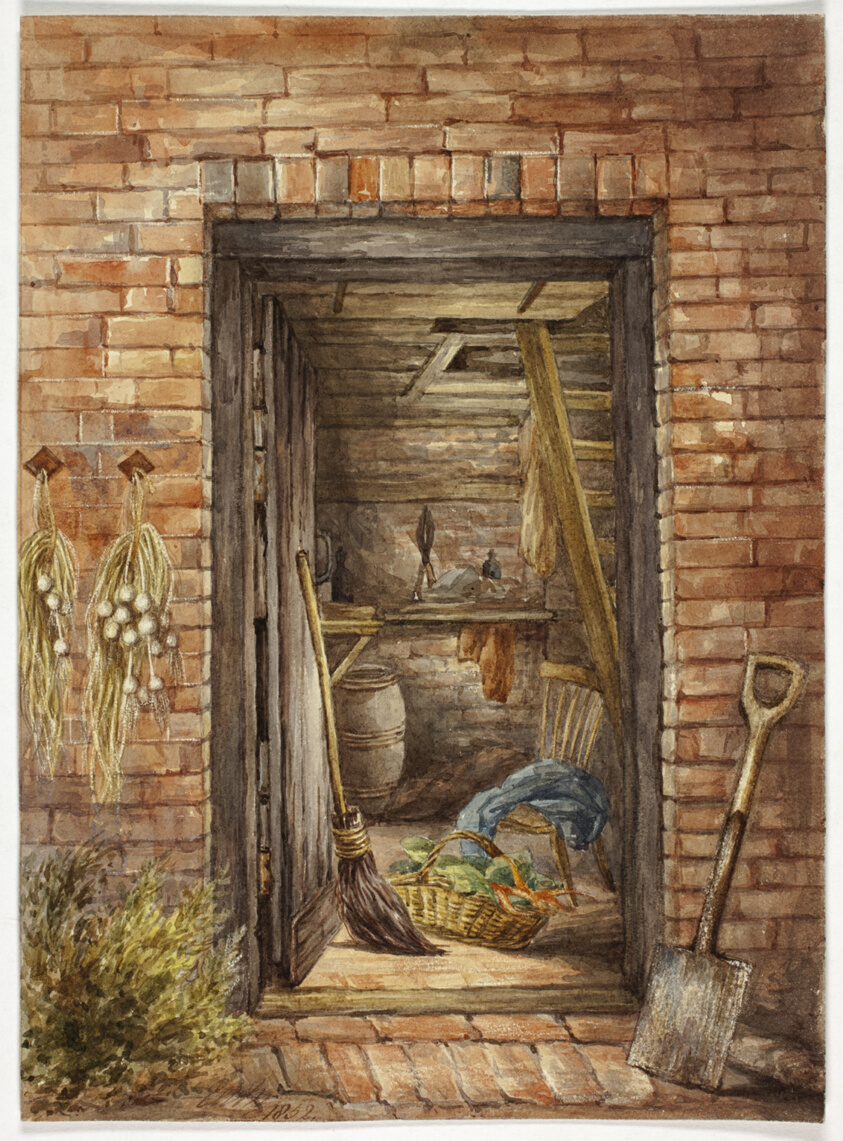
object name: Drawing and Watercolor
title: Brick Wall with Open Door and Shovel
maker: Elizabeth Murray (English, c. 1815-1882)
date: 1852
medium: Watercolor over traces of graphite on cream wove paper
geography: England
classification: watercolor; drawings (visual works); prints and drawing